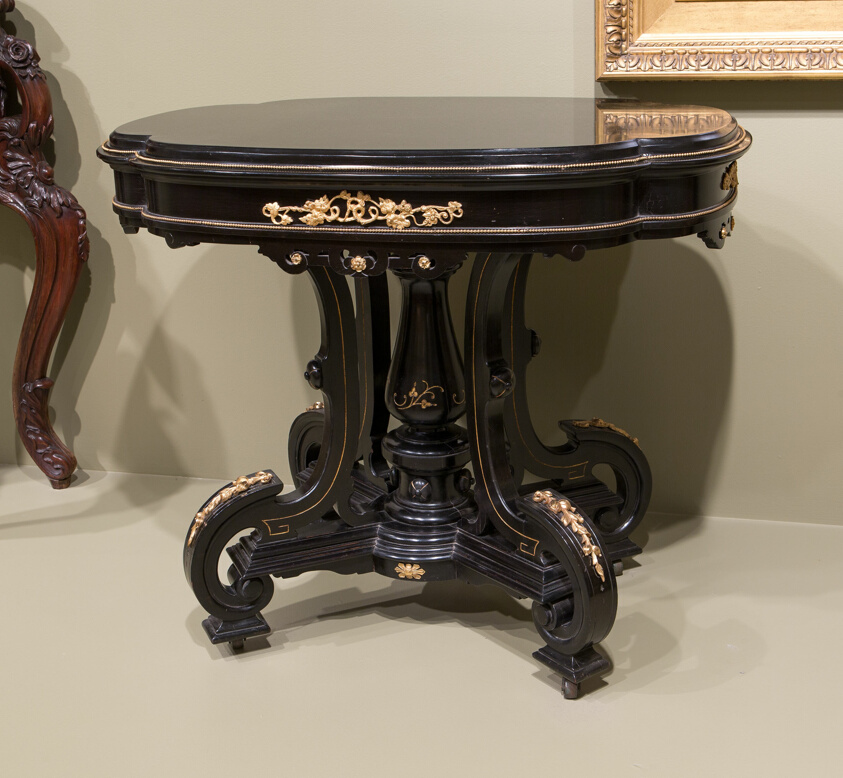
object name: Decorative Arts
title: Center Table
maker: Edward W. Hutchings; American, c. 1810–c. 1892; Ormolu mounts by Pierre E. Guerin; American, founded 1857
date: 1869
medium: Ebonized cherry, marble, and ormolu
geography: New York City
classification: table; furniture; american decorative arts; american arts; decorative arts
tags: furniture